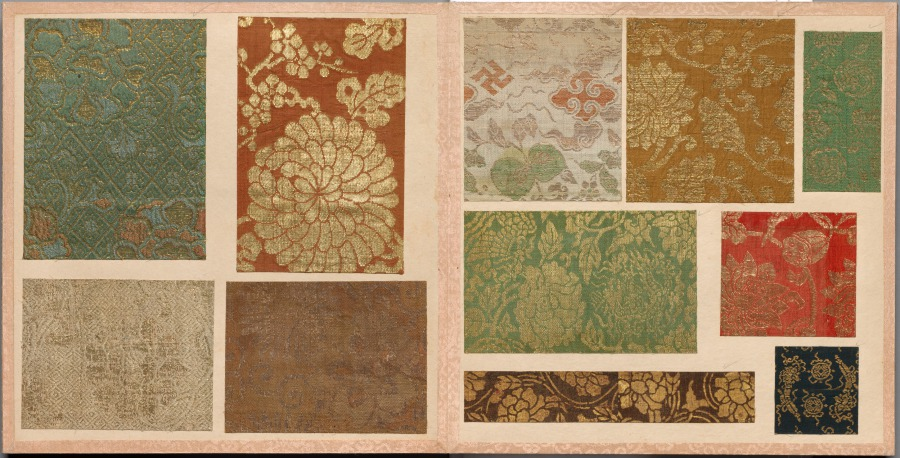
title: Album of Textile Samples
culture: Japan and China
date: 1700s–1800s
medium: silk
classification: Textile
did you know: This album has 26 pages containing 128 mounted Chinese or Japanese textile samples.